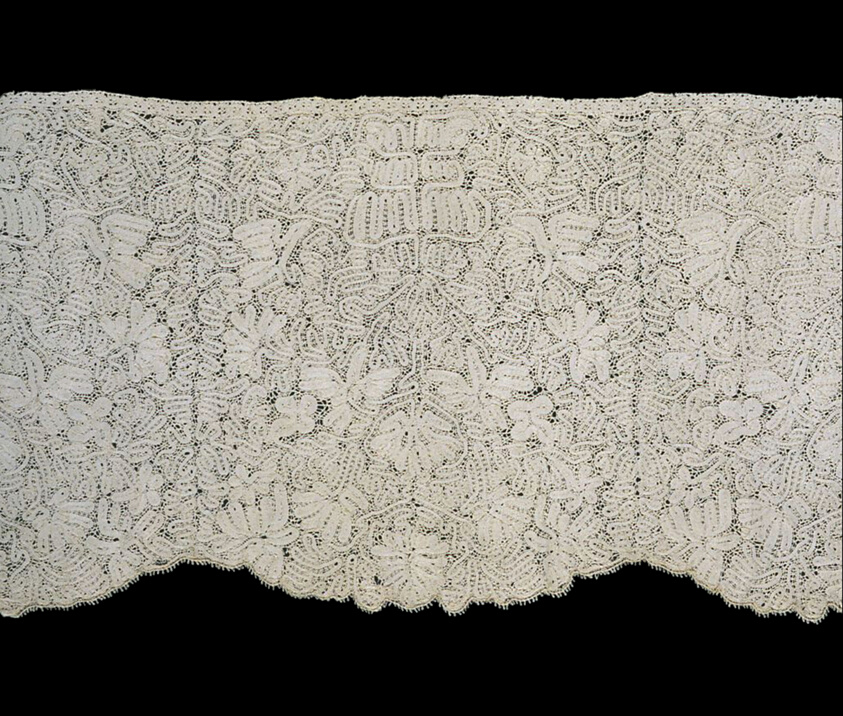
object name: Textile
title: Flounce (Possibly Valance from a Bed)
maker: Italy, Aquila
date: 1675/1750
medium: Linen, bobbin part lace; (continuous cloth work tapes); peasant work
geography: Italy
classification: textile; lace - bobbin